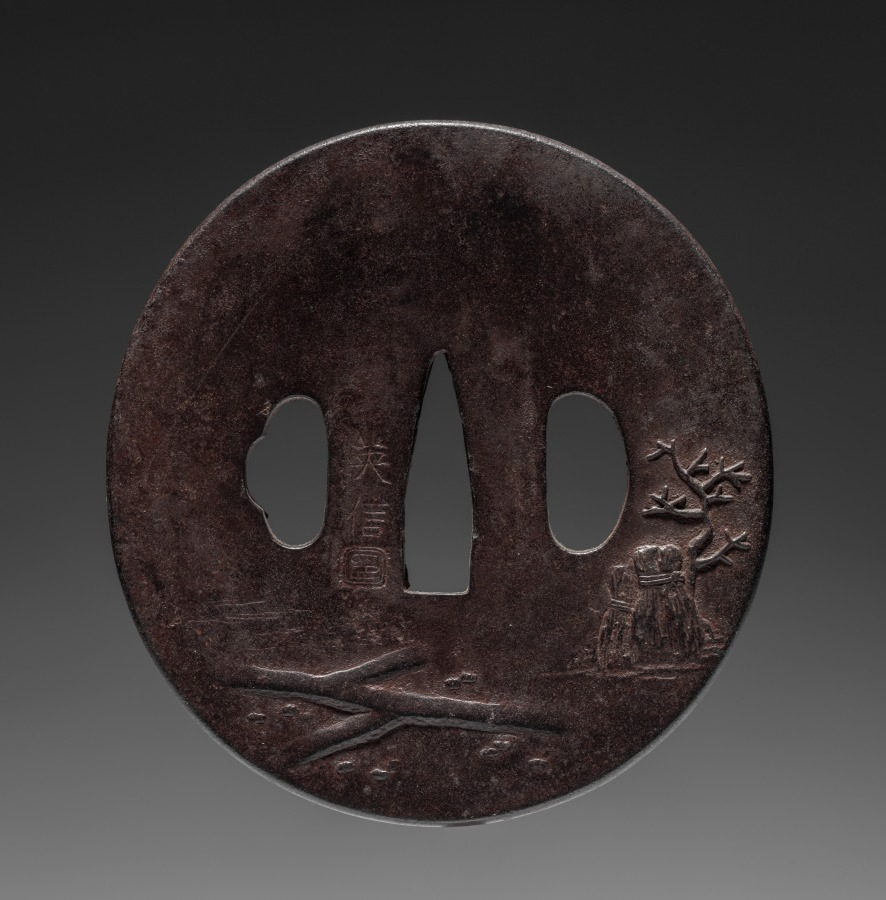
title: Sword Guard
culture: Japan, Edo period (1615–1868)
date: mid-1800s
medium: iron (Omori type)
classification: Arms and Armor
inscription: signed "Hidenobu" with seal.